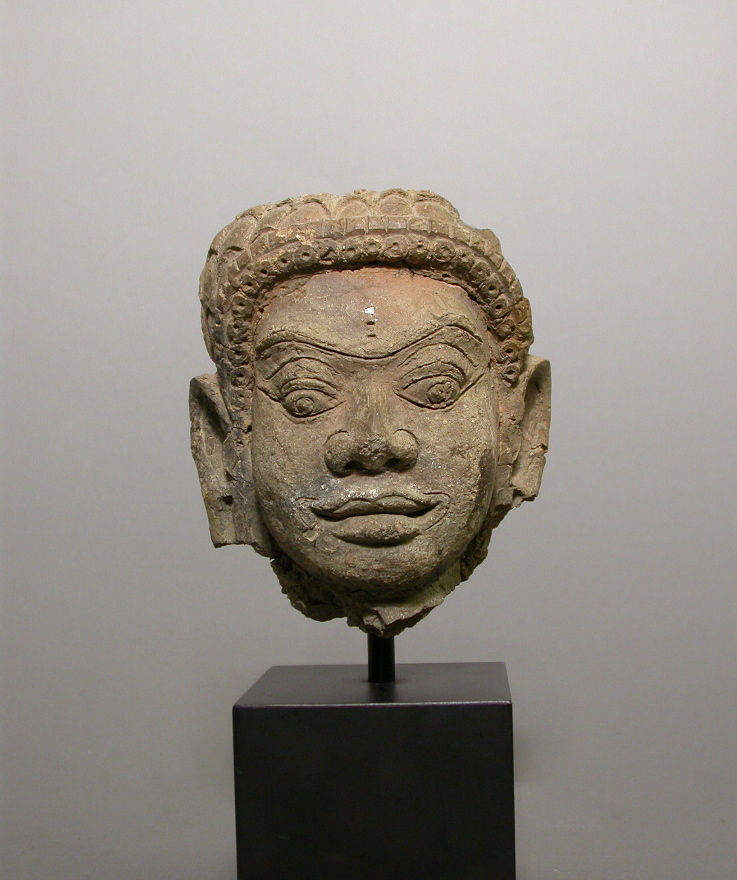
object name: Sculpture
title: Head of a Male Deity (Deva)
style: Southeast Asian, haripunjaya, thai, asian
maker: Thailand; Lamphun Province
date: Haripunjaya period, 11th/12th century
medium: Terracotta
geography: Thailand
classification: earthenware; ceramics; sculpture; asian art